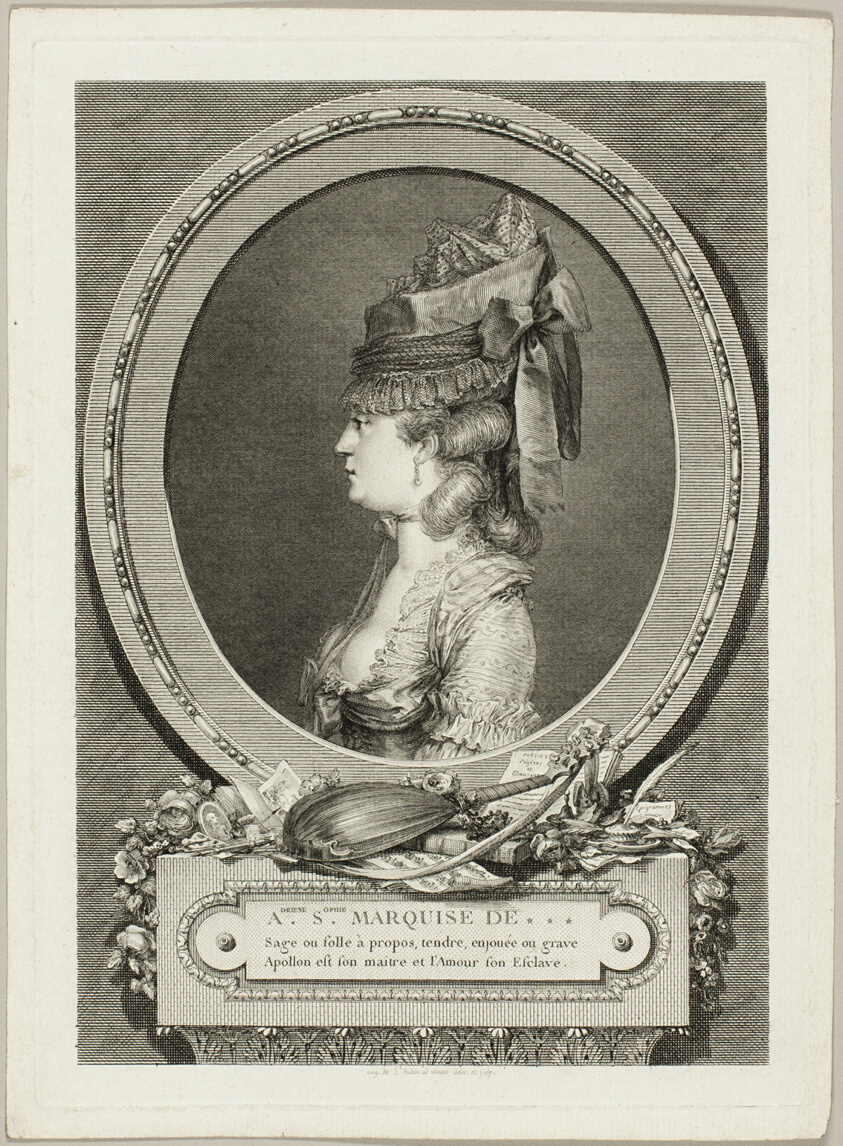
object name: Print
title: Adrienne-Sophie, Marquise of ***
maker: Augustin de Saint-Aubin (French, 1736-1807)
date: 1779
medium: Etching and engraving in black on ivory laid paper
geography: France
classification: etching; print; prints and drawing